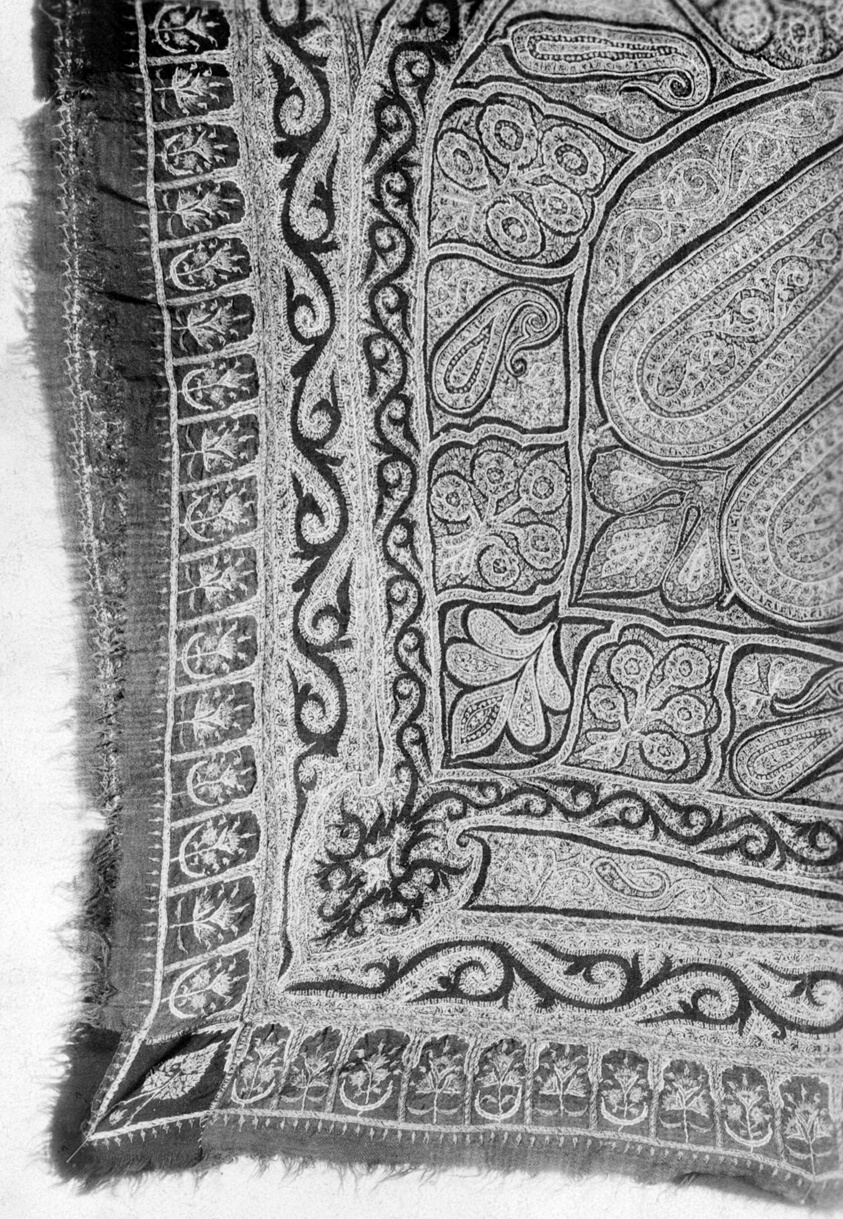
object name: Costume and Accessories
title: Shawl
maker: Eastern India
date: 1860s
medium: Cashmere wool, composed of many pieces of embroidered plain simple twill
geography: India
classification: textile; costume; weaving; dress (garment); clothing